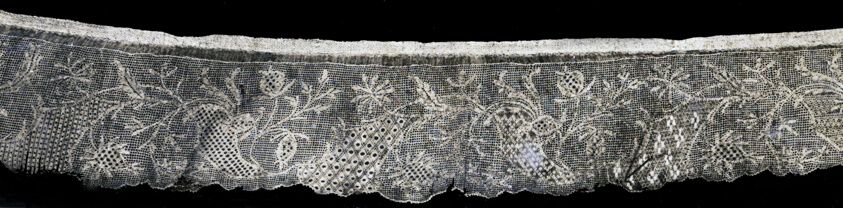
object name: Textile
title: Edge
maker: France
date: 1801/25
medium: Cotton, plain weave; embroidered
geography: France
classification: textile; needlework (visual works)